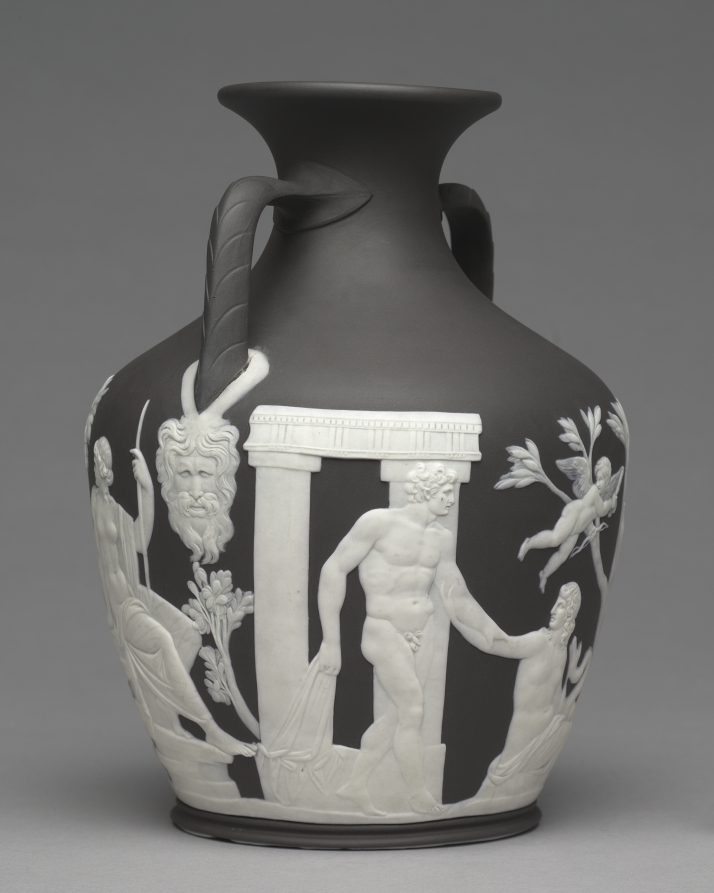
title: Portland Vase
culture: England, Staffordshire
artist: Josiah Wedgwood and Sons (Britain, Staffordshire, est. 1759)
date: c.1790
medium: jasperware with applied decoration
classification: Ceramic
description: The original Portland Vase is a Roman antiquity, made of dark-blue glass, dating from the first century AD. Such a rare archaeological find fascinated aristocratic collectors and artists alike, and eventually the vase came into the hands of the 3rd Duke of Portland in the 1780s. Around 1790 the duke lent the vase to the potter Josiah Wedgwood to make exact replicas in ceramic, of which the Cleveland example is one of the first editions. Eventually, the 4th Duke of Portland deposited the original Roman vase in the British Museum, where it resides today.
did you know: While the scene depicted here is not known for certain, many scholars believe that the Portland Vase portrays the wedding of Peleus and Thetis from Greek mythology.